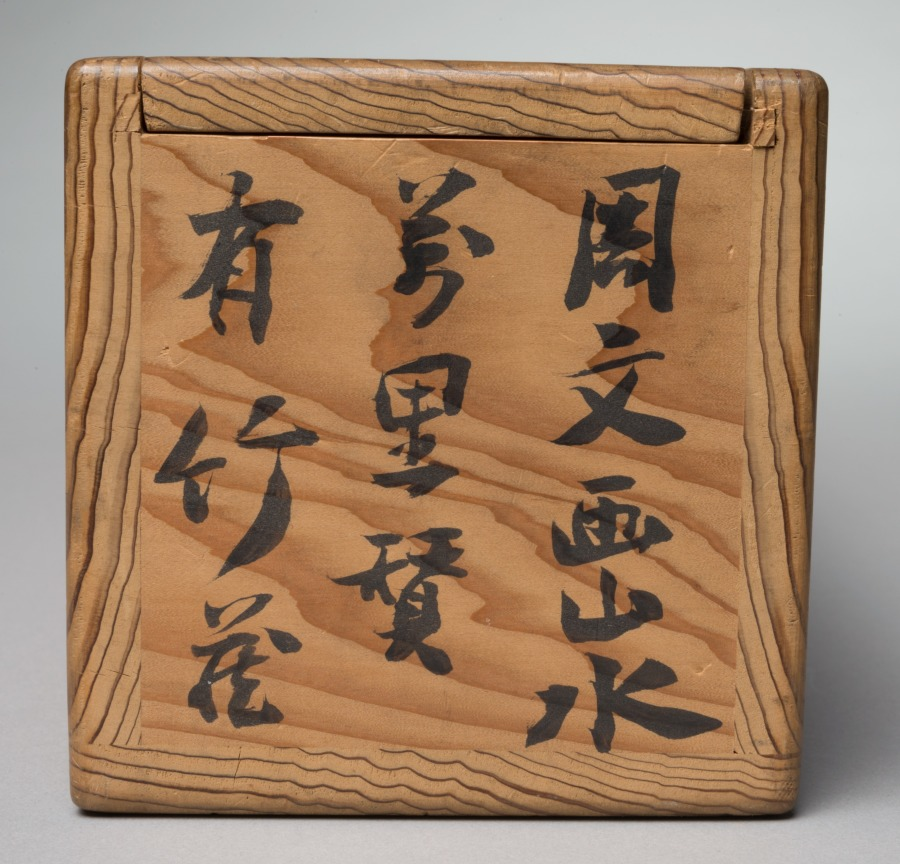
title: Lonely Temple and Towering Cliff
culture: Japan, Muromachi period (1392–1573)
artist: circle of Kenkō Shōkei (Japanese, active 1478–1506)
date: c. 1480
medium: hanging scroll; ink and slight color on paper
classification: Painting